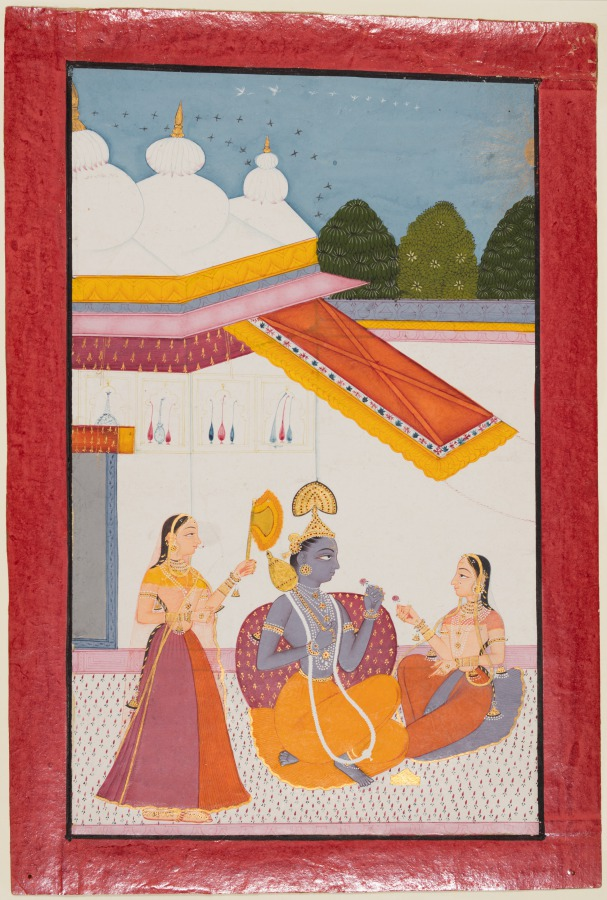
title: Krishna Under a Canopy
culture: Northwestern India, Rajasthan, Rajput Kingdom of Raghogarh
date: c. 1680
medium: Gum tempera and gold on paper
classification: Painting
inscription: 2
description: This tranquil, languid scene on a white marble, carpeted terrace depicts the god Krishna in the place of an earthly prince. A female attendant at the left fans him, while he and another lady each hold a rose. The open doorway in the background with the rolled-up curtain above suggests the intimacy of an imminent encounter inside.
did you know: Krishna holds a scepter, or mace, which is one of the weapons of the god Vishnu, of whom he is an incarnation.